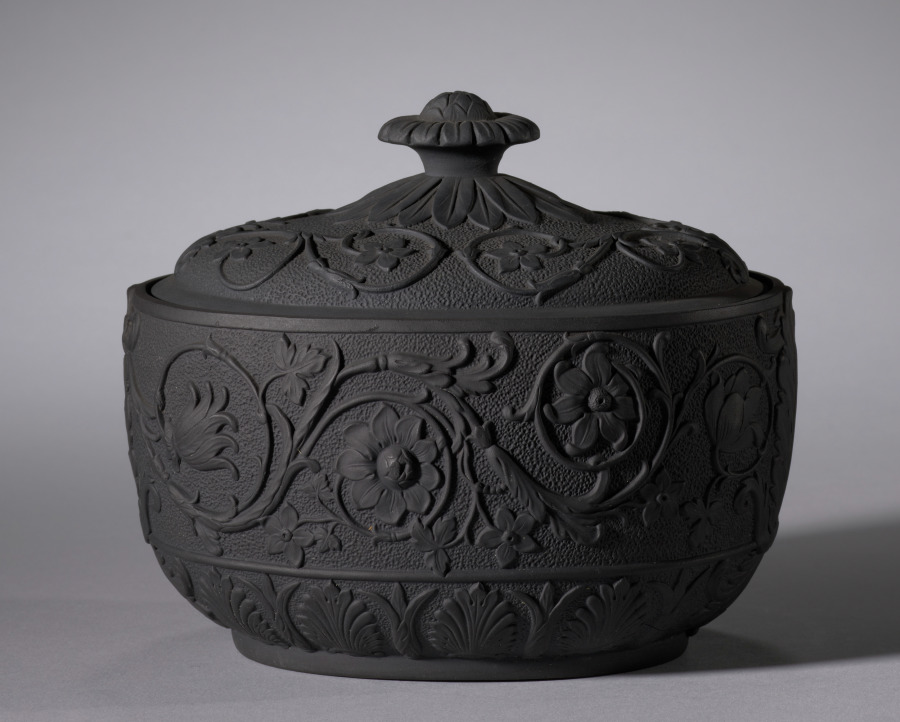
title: Teapot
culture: England, 19th century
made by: Elijah Mayer (British, c. 1770–1805)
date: c. 1810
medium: black basalt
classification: Ceramic